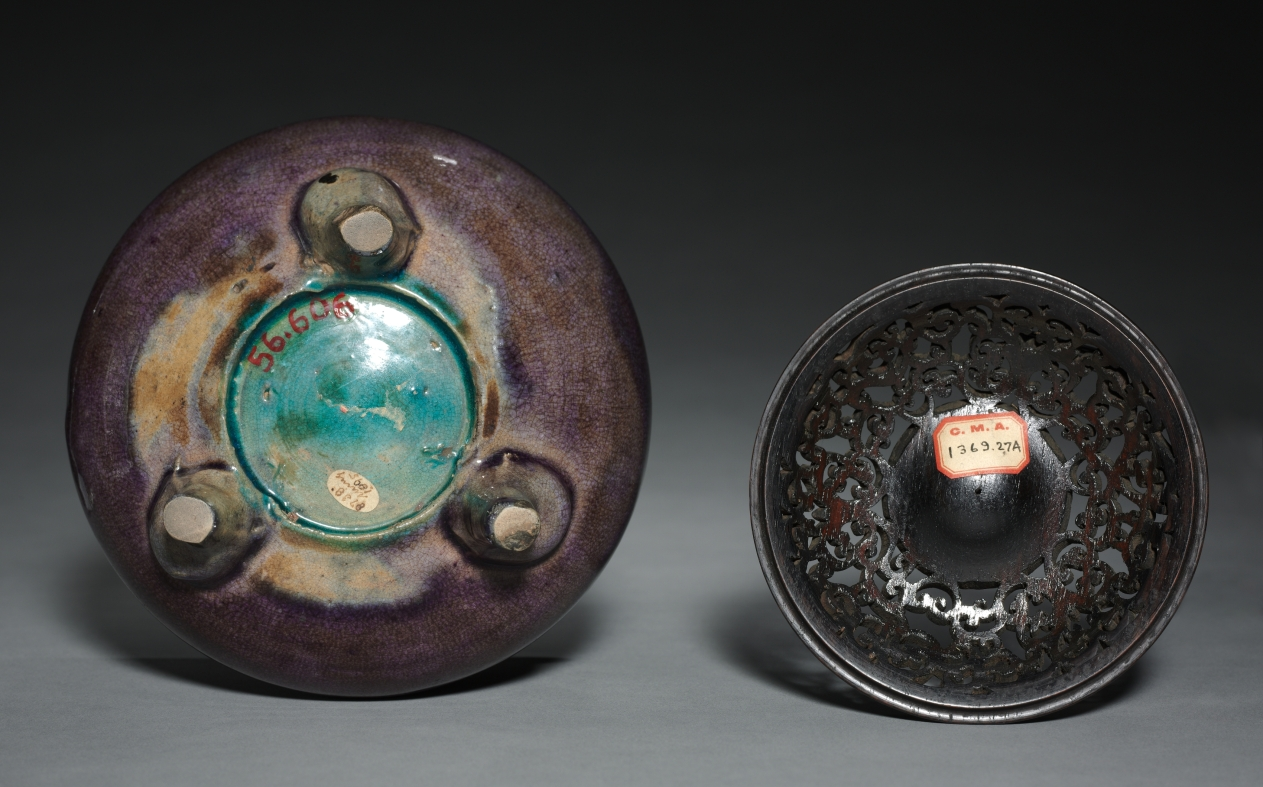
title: Tripod: Ding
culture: China, Ming dynasty (1368–1644)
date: 1368–1644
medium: porcelain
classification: Ceramic